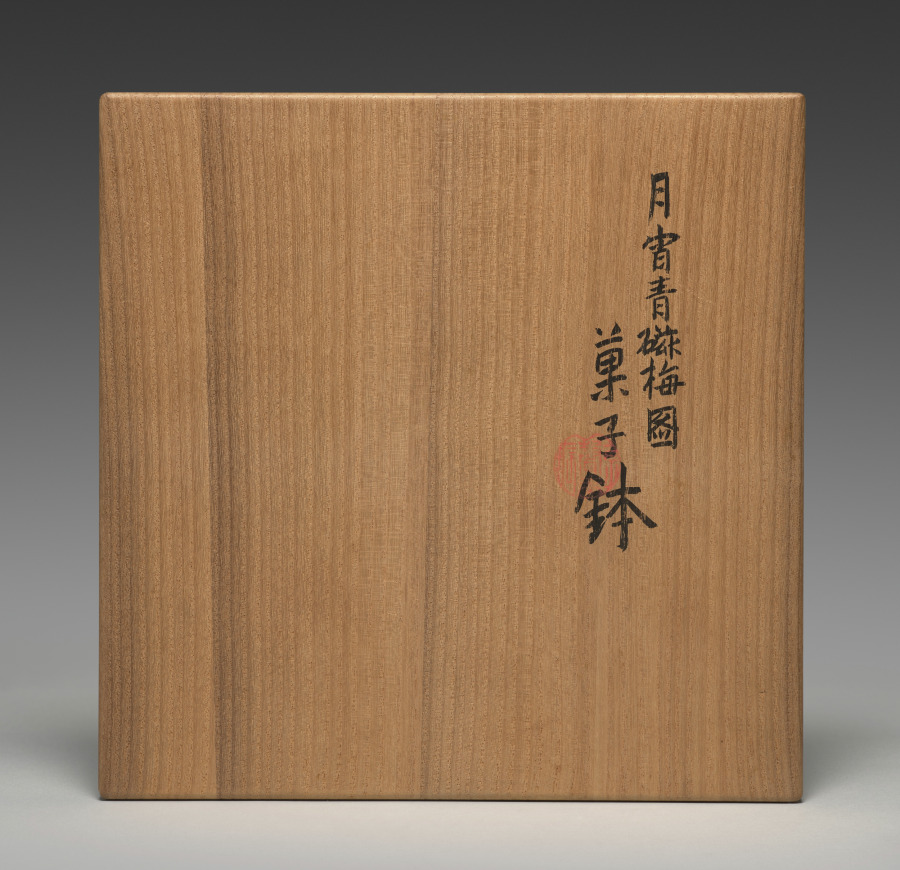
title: Sweets Bowl with Plum Tree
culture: Japan, Taishō period (1912–26) to Shōwa period (1926–89)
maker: Seifū Yohei IV (Japanese, 1872–1951)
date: 1914–46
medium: Porcelain with underglaze color and modeled design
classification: Ceramic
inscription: 清風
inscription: 清風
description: In Chinese culture, the plum symbolizes the virtue of perseverance. For his sweets bowl based on Qing dynasty (1644–1911) Chinese prototypes, Seifū Yohei IV first painted the gnarled boughs of a plum tree in iron oxide on the surface. Then he made the tree’s blossoms slightly raised by building up slip, or liquified clay. He painted their centers yellow. Before applying the blue glaze, he covered the blossoms with paper so that they remained white.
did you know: Broad access to high-quality Chinese ceramics occasioned by the collapse of the Qing dynasty (1644–1911) and the dispersal of elite Chinese collections presented Seifū Yohei IV with models for both molded decoration and painted motifs.